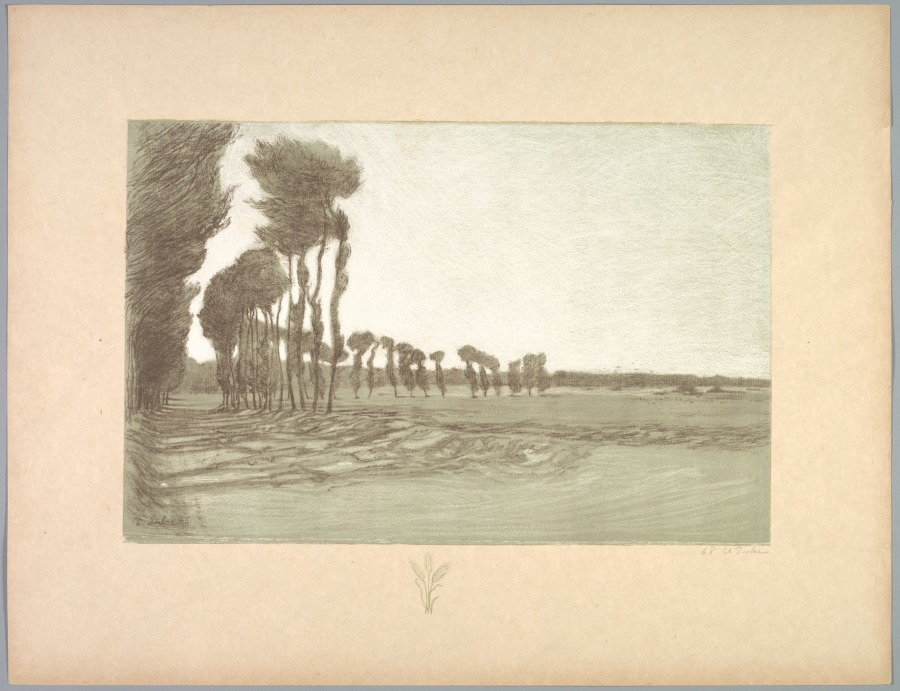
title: Suite de Paysages: Landscape, Plate 5, Remarque, Three Stalks of Wheat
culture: France, 19th century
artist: Charles Marie Dulac (French, 1865–1898)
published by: Printer: Belfond, Imprimeur Belfond (per colophon)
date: 1892–1893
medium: color lithograph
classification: Print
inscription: Below image, right, in graphite: 68 Ch. Dulac; in plate, lower left: Ch. Dulac t.5